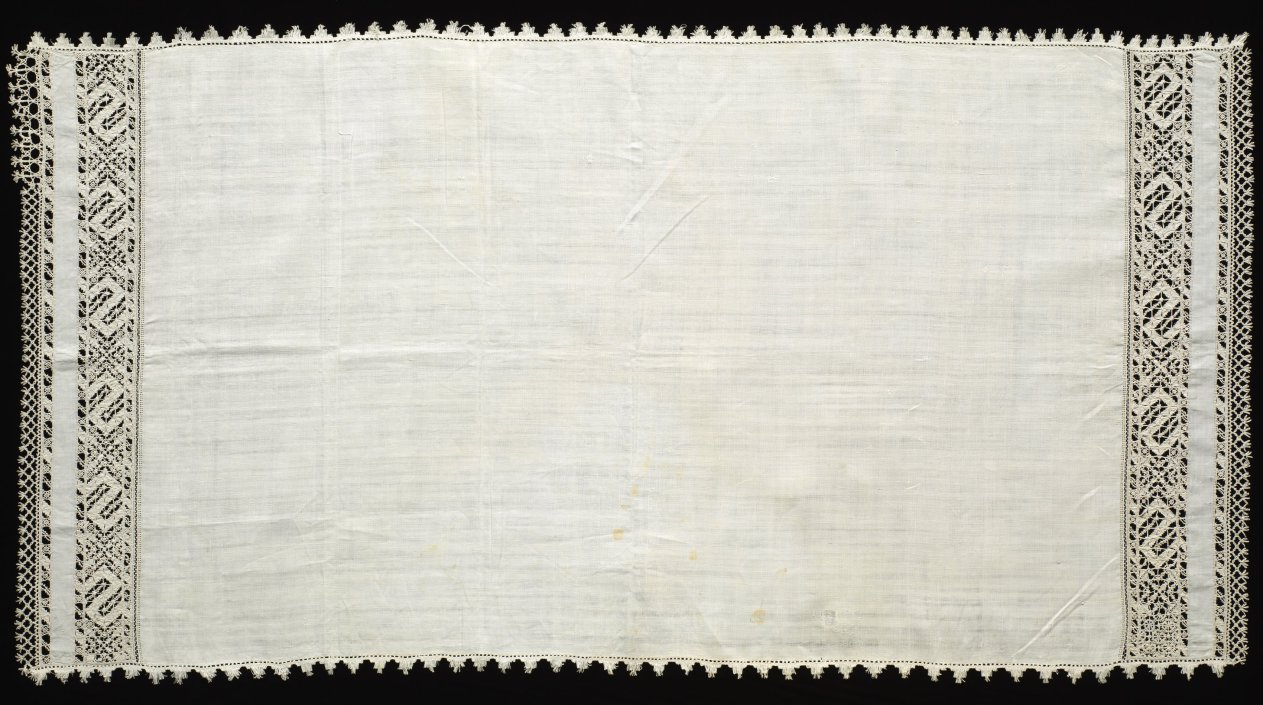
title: Lace Cloth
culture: Italy, Venice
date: 1500s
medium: Linen: needle lace, reticella and bobbin lace border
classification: Lace